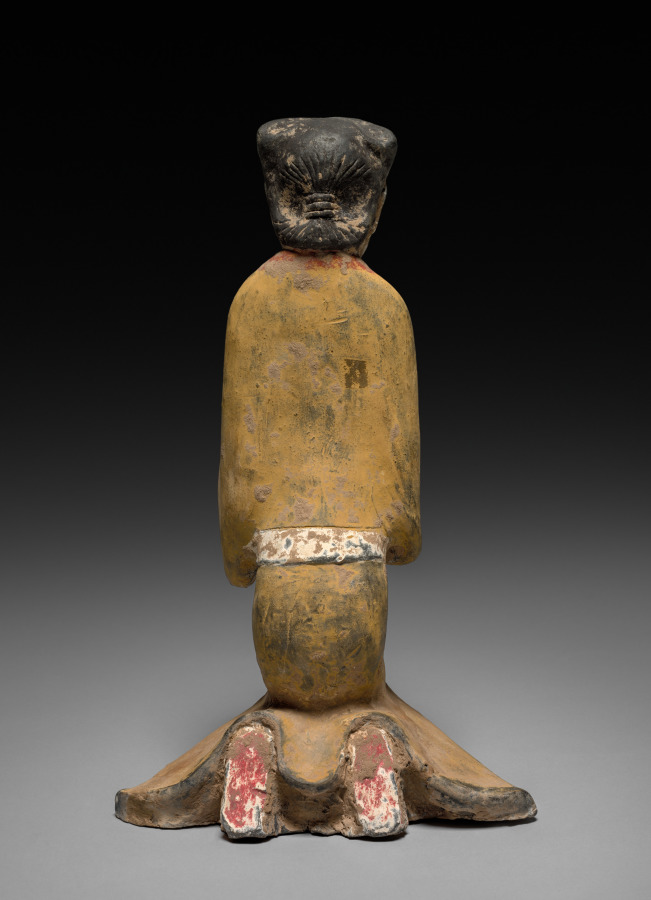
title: Kneeling Woman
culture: China, Western Han dynasty (206 BCE–8 CE) to Eastern Han dynasty (25–220 CE)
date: 100 BCE–100 CE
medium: painted earthenware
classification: Sculpture